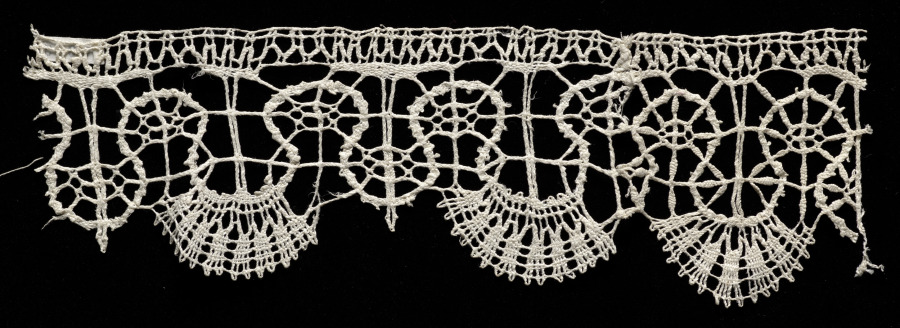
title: Lace Edging with Bell Points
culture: Italy, Genoa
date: 1700s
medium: Bobbin lace (rose lace)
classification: Lace